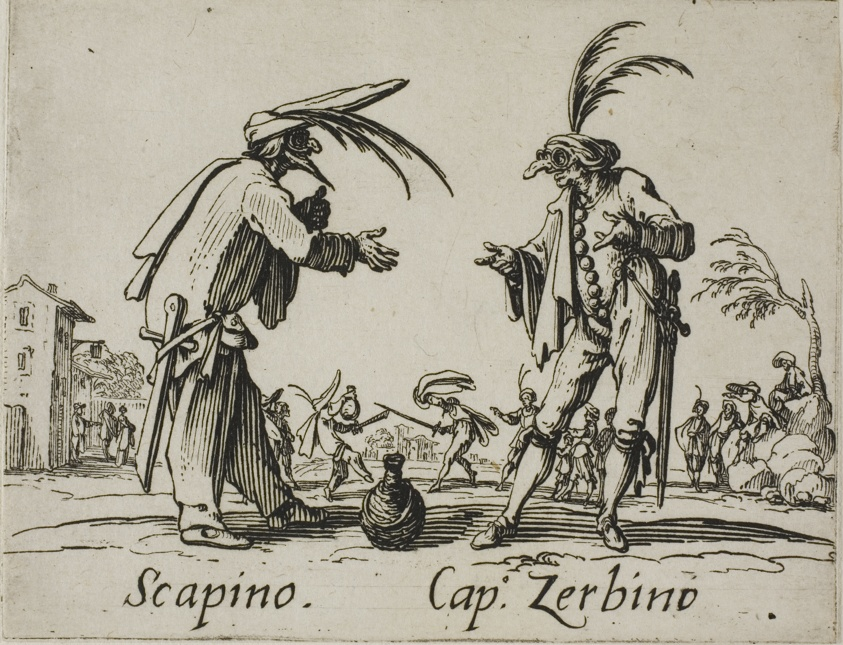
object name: Print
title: Scapino - Capitano Zerbino, plate 12 from Balli di Sfessania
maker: Jacques Callot (French, 1592-1635)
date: c. 1622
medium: Etching and engraving on paper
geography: France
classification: etching; print; prints and drawing